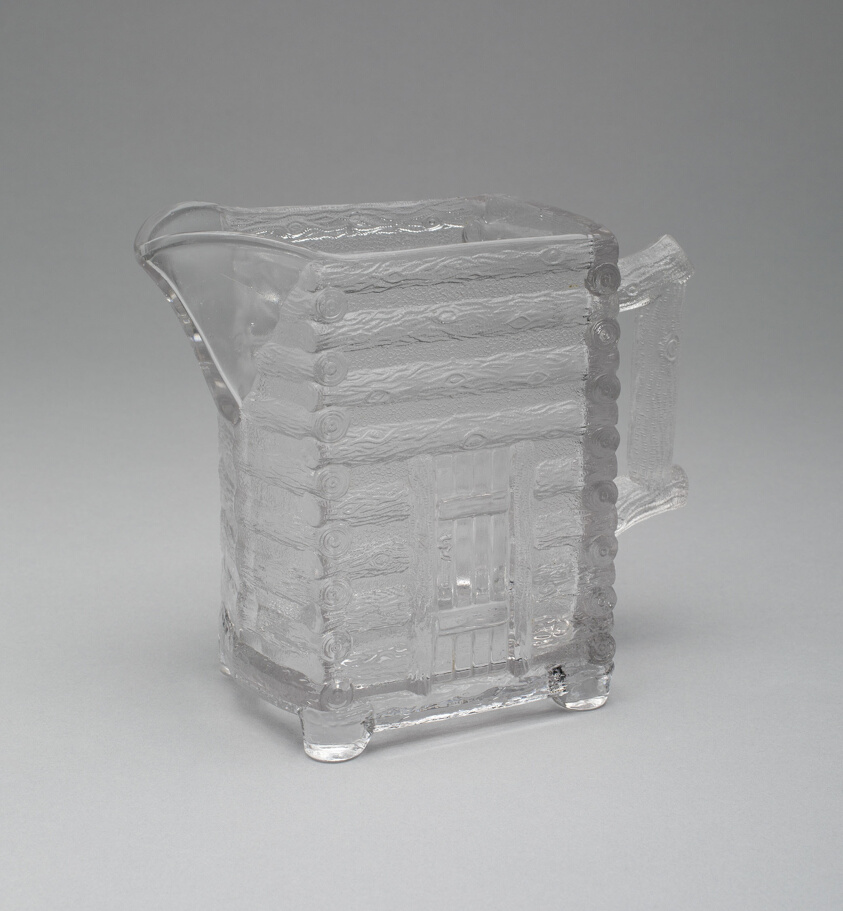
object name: Glass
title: "Log Cabin" pattern creamer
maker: Central Glass Company; American, 1867–1896; Wheeling, West Virginia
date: c. 1875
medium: Pressed glass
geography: Wheeling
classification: glass; creamer; american decorative arts; american arts; decorative arts